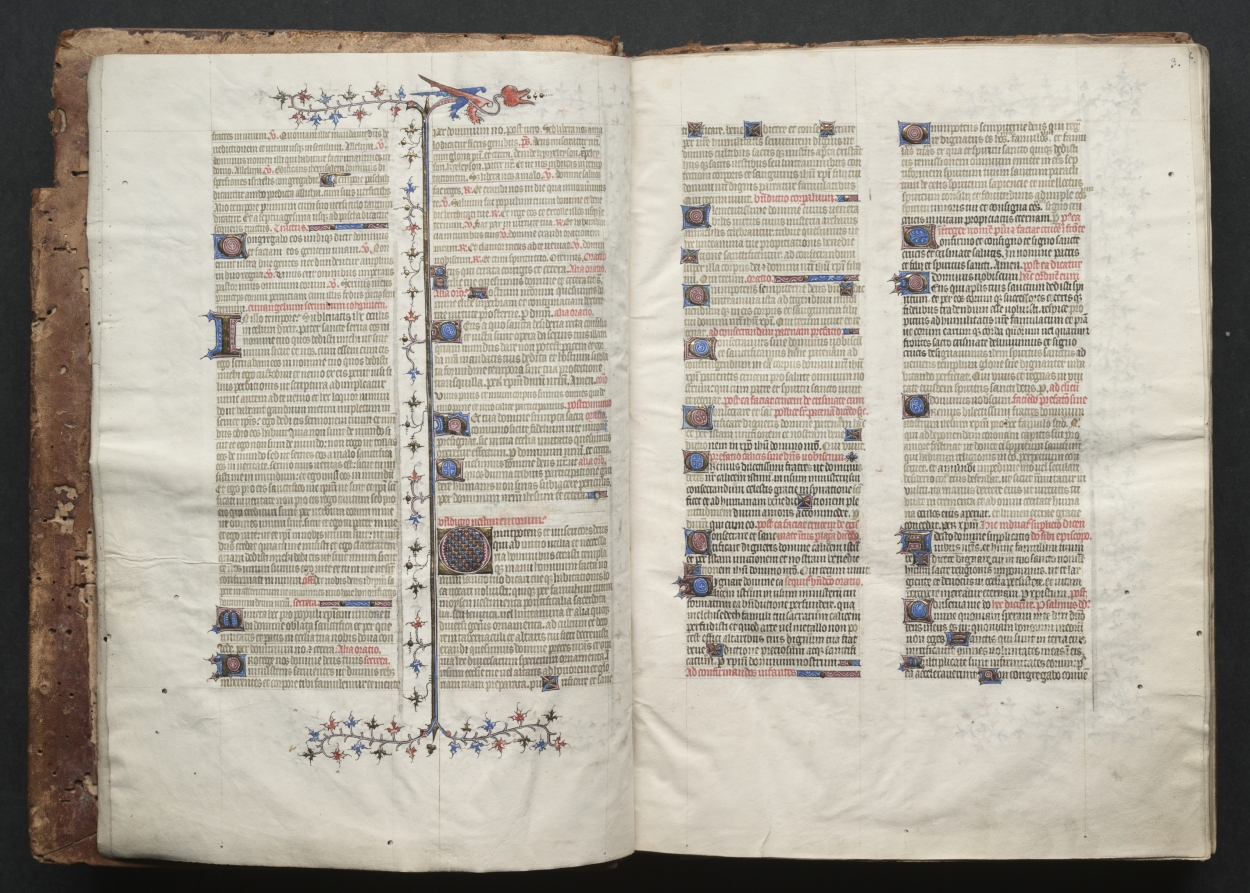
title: The Gotha Missal: Fol. 3r, Text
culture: France, Paris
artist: Master of the Boqueteaux (French)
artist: and Workshop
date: c. 1375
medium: ink, tempera, and gold on vellum; blind-tooled leather binding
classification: Bound Volume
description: The style and quality of this manuscript's decoration is typical of deluxe Parisian books made for aristocratic or royal patrons. Most of the book's decoration appears to be the work of the Master of the Boqueteaux, an artist active at the court of King Charles V (died 1380). His style was apparently shared by a number of book illuminators working in and around Paris. It is very possible that the Gotha Missal belonged to Charles V, but is not provable because the manuscript has no royal portraits and lacks a colophon. Given the book's magnificent decoration, however, it would seem that it was produced for a Valois prince, if not for the king himself. The manuscript receives its name from the German dukes of Gotha, its later owners.